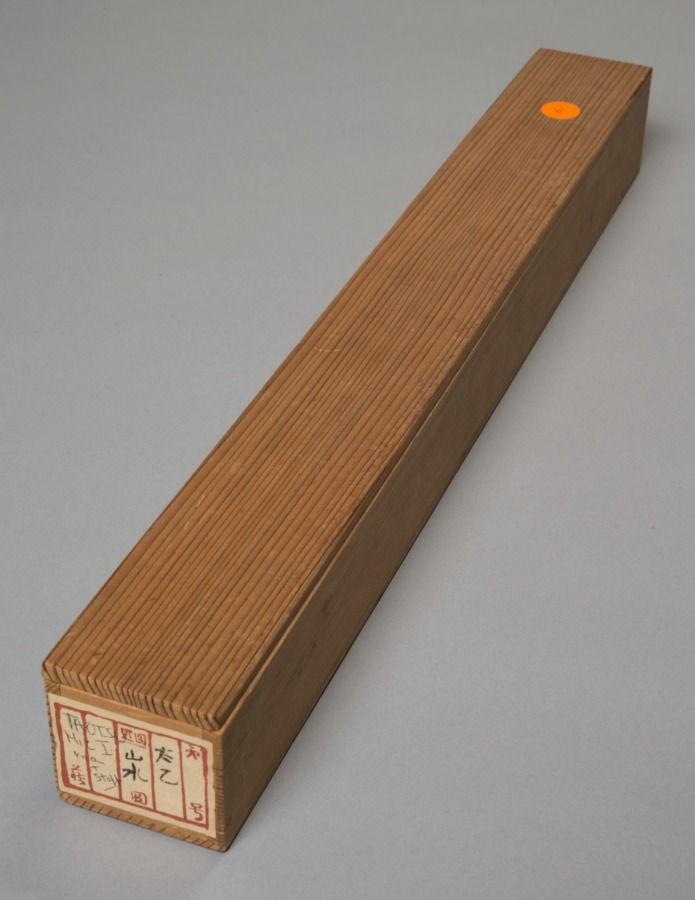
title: Casually Created on a Spring Day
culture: Japan, Edo period (1615–1868) to Meiji period (1868–1912)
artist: Murase Taiitsu (Japanese, 1803–1881)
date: c. 1825–81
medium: hanging scroll; ink on paper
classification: Painting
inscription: artist's inscription, signature, and seal at top of painting.